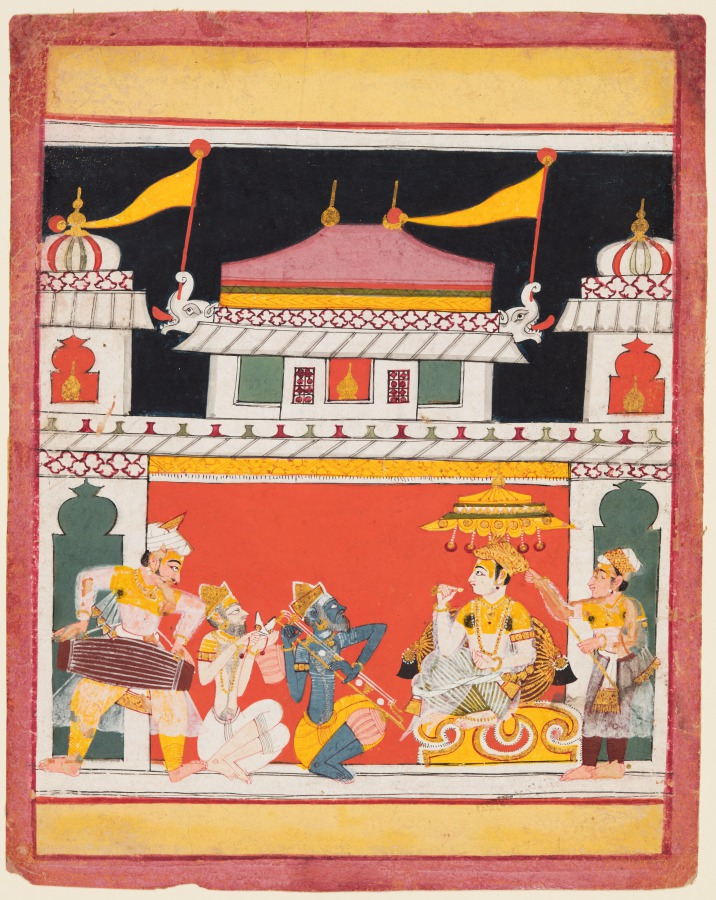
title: Three Musicians Perform Before a King: Shri Raga, from a Ragamala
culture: Central India, Madhya Pradesh, Malwa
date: c. 1650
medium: gum tempera, ink, and gold on paper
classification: Painting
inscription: Verso: Text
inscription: Verso: Stamped, Tasvir Khana, No: 4, Datiya State (Later date), the lower stamp is not visible in the image.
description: A king sits on a throne with a yogic band around his legs, listening to the music of two sages: a blue-skinned sage on a stringed instrument (vina), and a white-skinned one playing cymbals. A standing percussionist accompanies them on a drum. An attendant behind the king holds the royal canopy over his head.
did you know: Rainspouts in the form of mythical elephant-crocodiles (makara) hold yellow flags in their trunks.